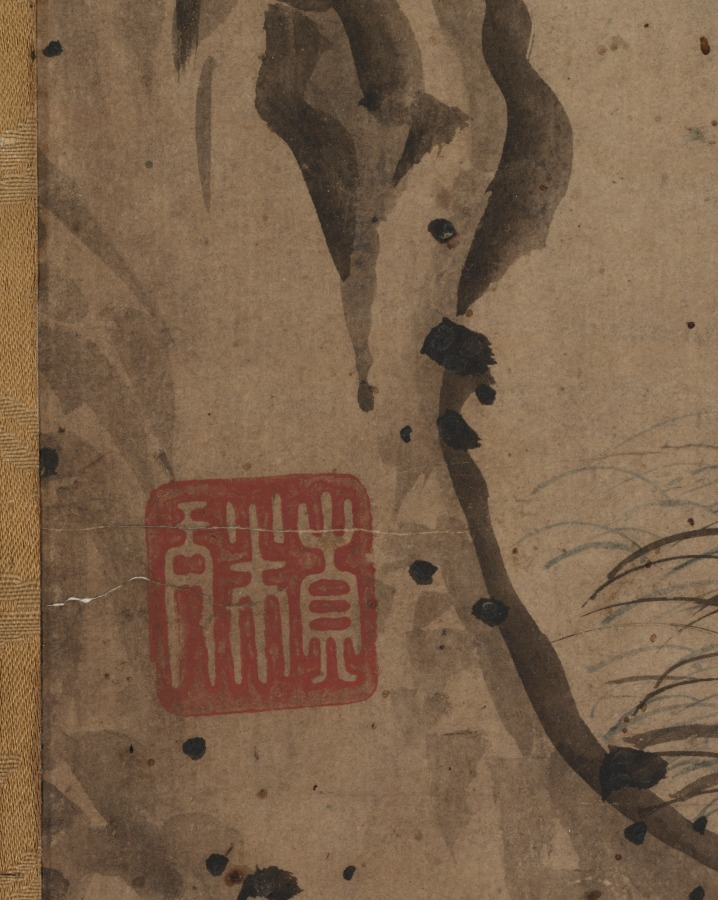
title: Emperor Minghuang Teaching Yang Gueifei to Play the Flute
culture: Japan, Muromachi period (1392–1573)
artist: Choryusai (Japanese)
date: late 1400s–early 1500s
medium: hanging scroll; ink and color on paper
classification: Painting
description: Minghuang, a prominent emperor of Tang (618-906) China and his consort, Yang Gueifei, have inspired many legends, paintings, and poetry in later Chinese culture. Through the study of Chinese literature and the collecting of Chinese paintings, tales of their lives and romance became well-known in Muromachi Japan.